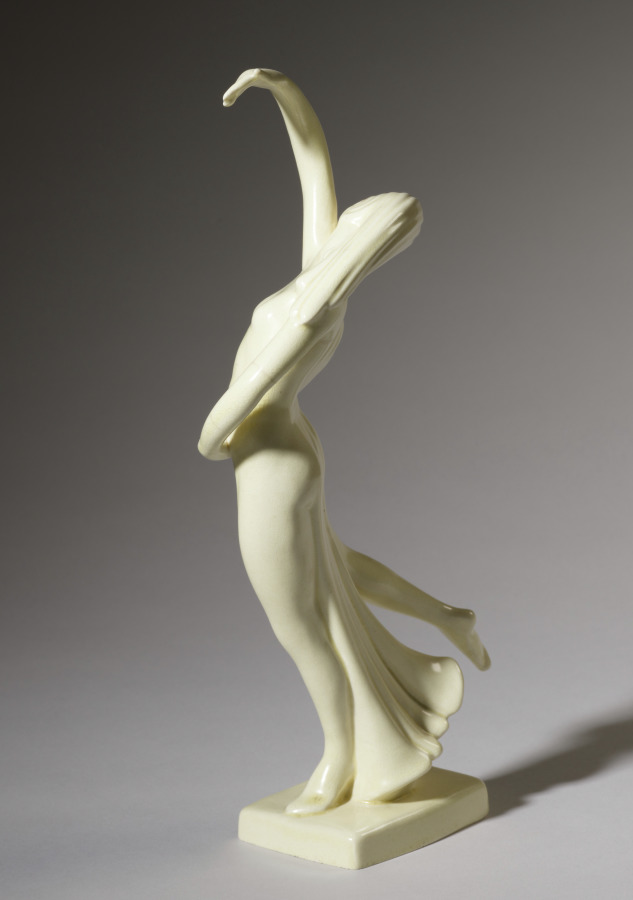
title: Fan Dancer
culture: America, Ohio, Cleveland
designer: Waylande Gregory (American, 1905–1971)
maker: Cowan Pottery Studio (America, Rocky River, Ohio, 1920–1931)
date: 1928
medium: glazed ceramic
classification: Ceramic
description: A stamp on the bottom of this ceramic sculpture indicates that it was produced at the Cowan Pottery studios. Although unsigned, it was most likely designed by Waylande Gregory, one of the studio’s premiere artists. In 1928 the studio’s founder, R. Guy Cowan, brought Gregory to Cleveland from Chicago, where he was developing a reputation as a talented young sculptor. Cowan Pottery, located in Lakewood (1912–17) and later Rocky River (1919–32), Ohio, began producing ceramic sculpture in the mid-1920s, launching its most fertile creative period. Cowan employed a large team of talented artists at the studio, including Walter Sinz, Thelma Frazier Winter, and Viktor Schreckengost. The studio brought national fame to Cleveland ceramists, but was forced to close due to economic circumstances in 1932.